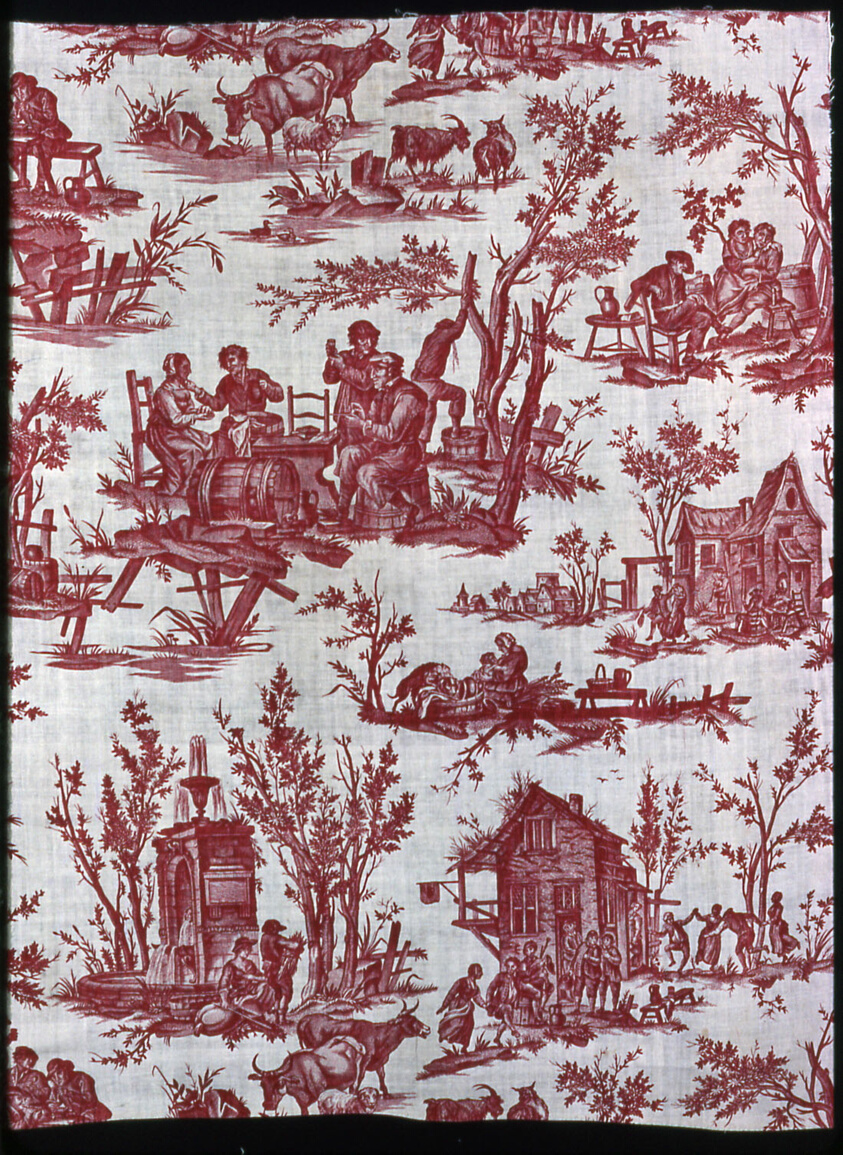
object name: Textile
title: Scènes Flamandes (Furnishing Fabric)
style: jouy-en-Josas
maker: Designed by Jean Baptiste Huet (French, 1745–1811) after various artists; Manufactured by Christophe-Philippe Oberkampf (naturalized French, 1738-1815), Oberkampf Manufactory (French, 1760-1843); Jouy-en-Josas, France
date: 1775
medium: Cotton, plain weave; copperplate printed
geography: Jouy-en-Josas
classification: textile; weaving - printed; furnishing textile